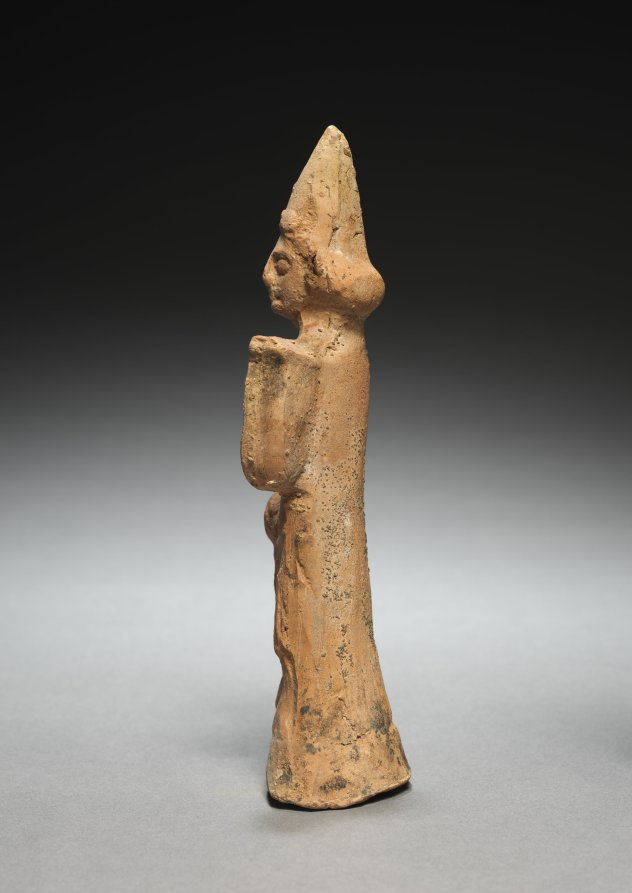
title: Draped Figure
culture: Parthian Empire (247 BCE–224 CE)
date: 1–200 CE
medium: terracotta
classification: Sculpture